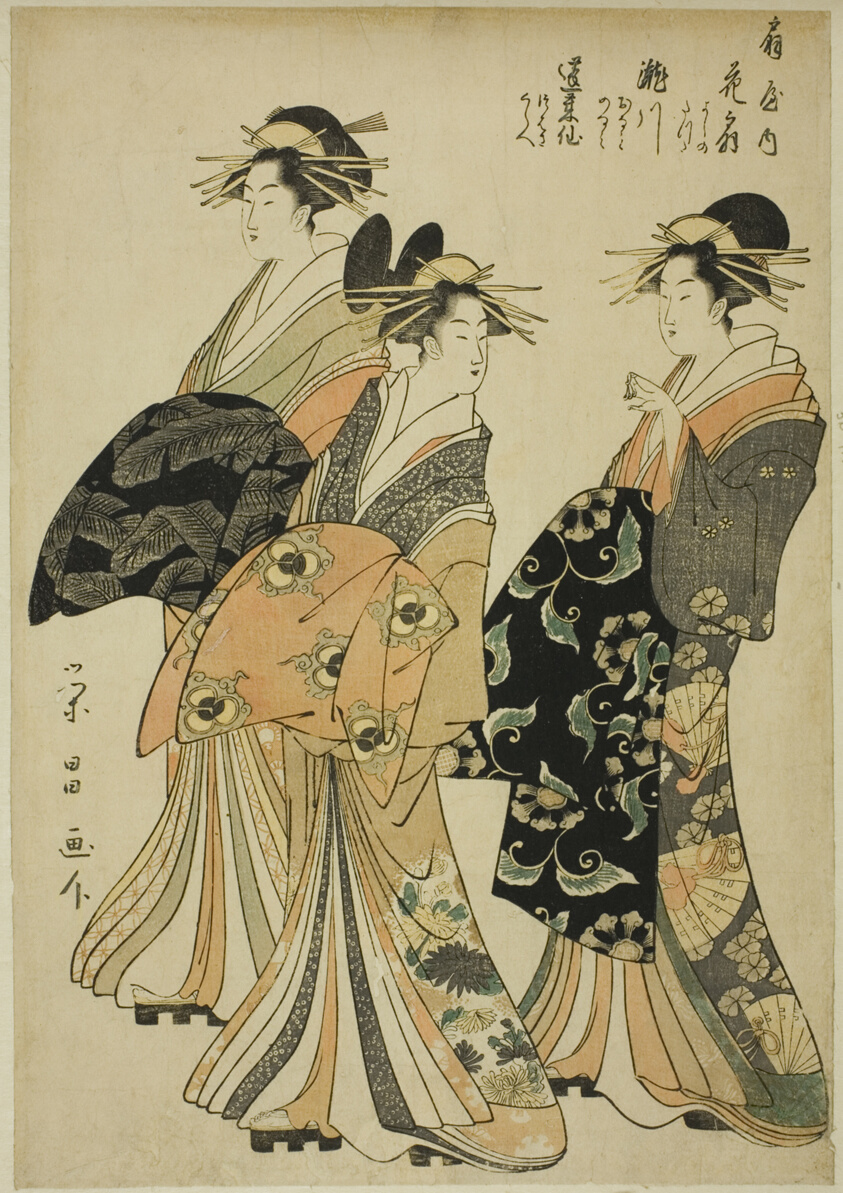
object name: Print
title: The Courtesans Hanaogi, Segawa, and Miyahito of the Ogiya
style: Japanese (culture or style)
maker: Chokosai Eisho (Japanese, active 1780–1800)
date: c. 1796/97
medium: Color woodblock print; oban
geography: Japan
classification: woodblock print; print; asian art